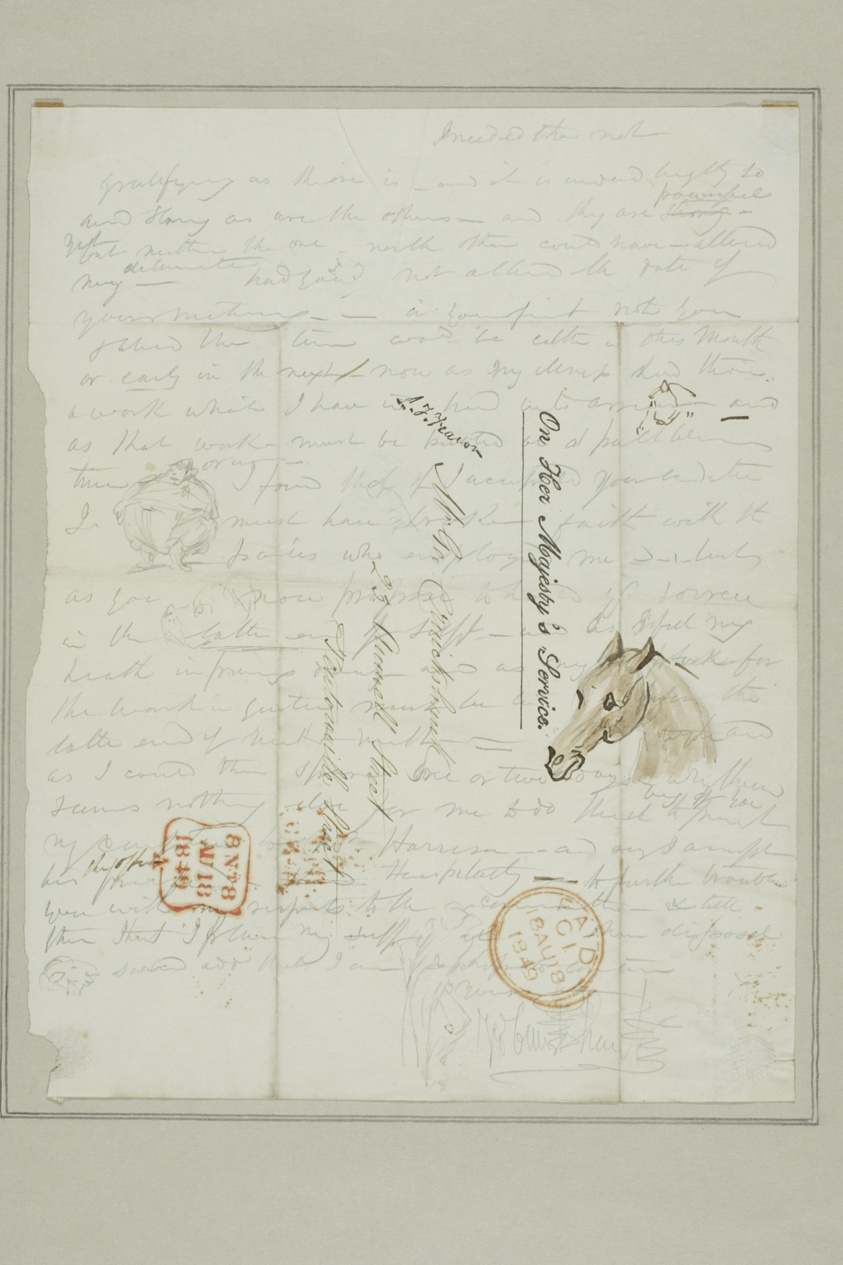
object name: Drawing and Watercolor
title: Untitled (Cruikshank letter with sketches of horse head)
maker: George Cruikshank (English, 1792-1878)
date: 1812/78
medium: Graphite with pen and brown ink, pen and black ink, red stamps and watercolor on cream wove paper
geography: England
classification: letter; prints and drawing; drawings (visual works)